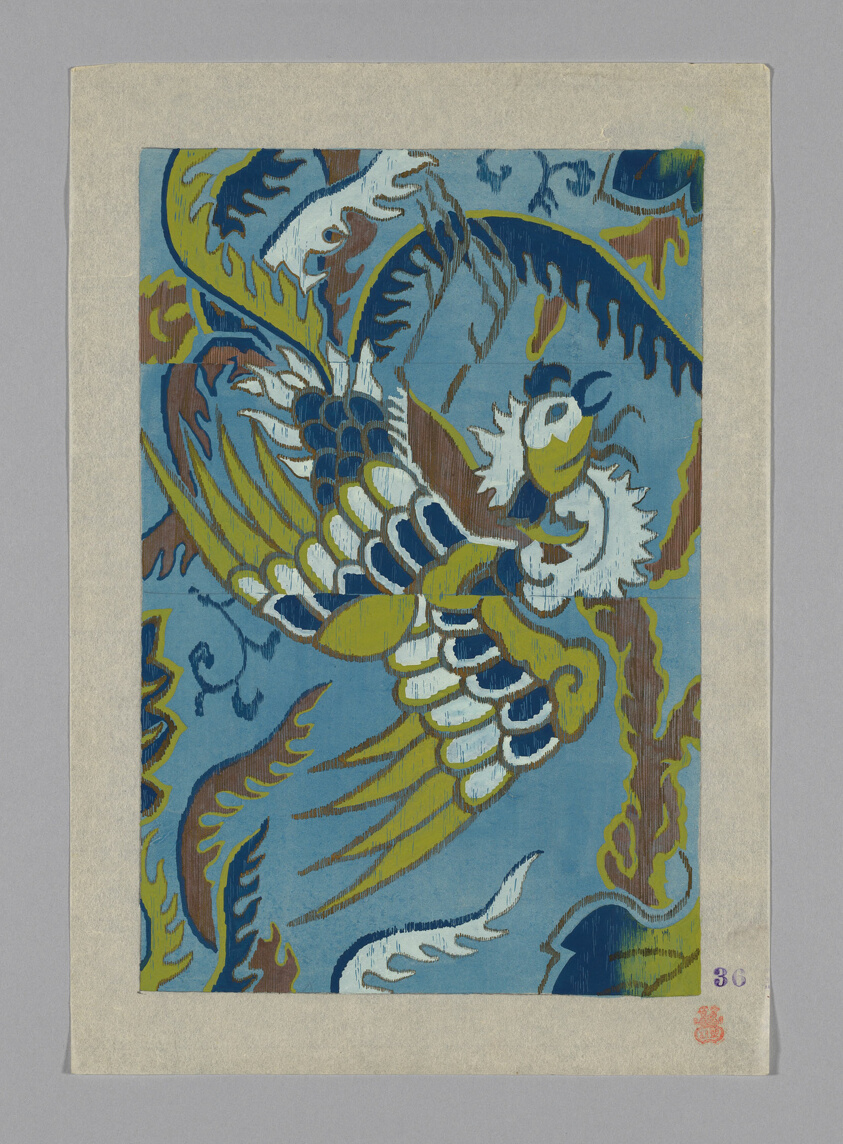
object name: Drawing and Watercolor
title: Design on Paper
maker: Japan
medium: Paper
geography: Japan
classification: textile; accessory - paper design; paper; watercolor